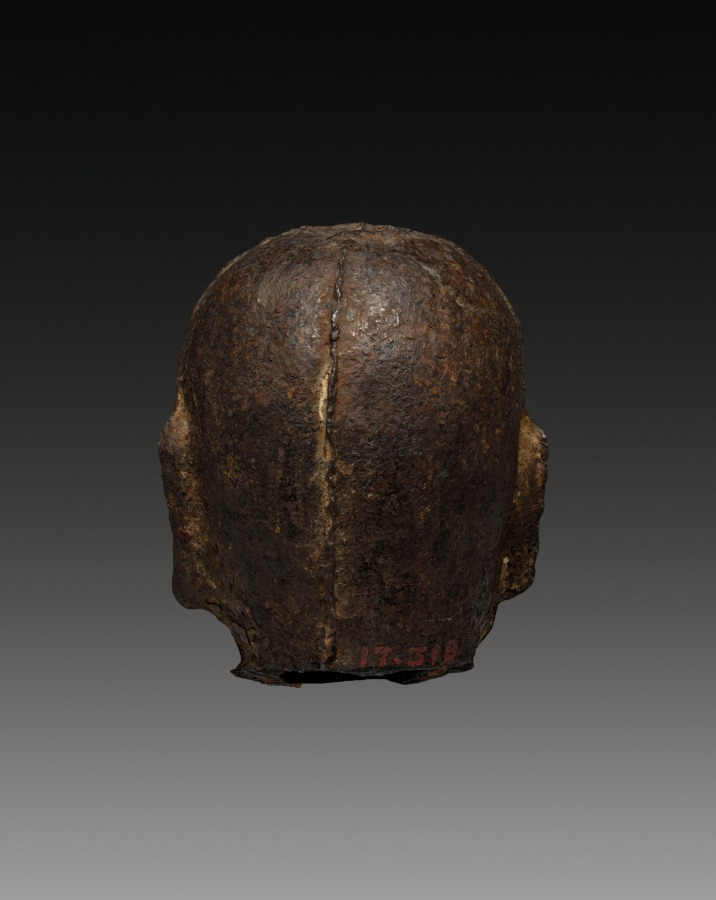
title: Head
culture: China, Song dynasty (960-1279)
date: 960–1279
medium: iron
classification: Sculpture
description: The shaven head and face of this ascetic expresses character and personality. It may have once been part of a figure of a monk or lohan, an enlightened being with supernatural power.